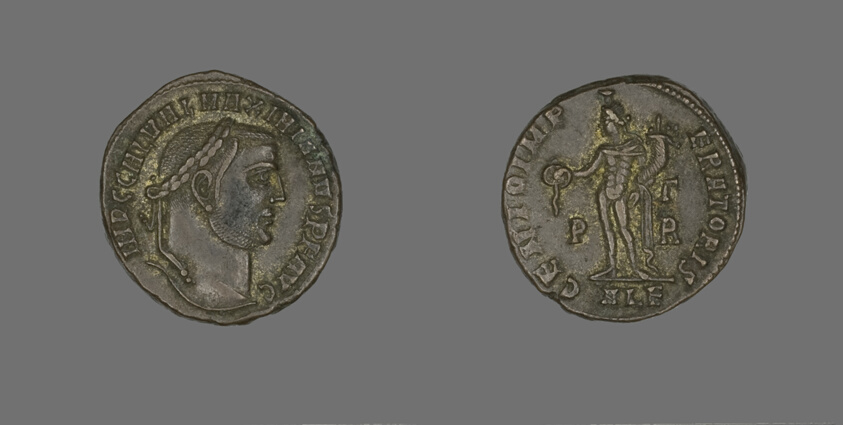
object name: Coin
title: As (Coin) Potraying Emperor Galerius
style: greco-roman, greco-roman (egyptian)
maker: Roman, minted in Alexandria, Egypt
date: 308-310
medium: Bronze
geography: Ancient Mediterranean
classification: coin; ancient art